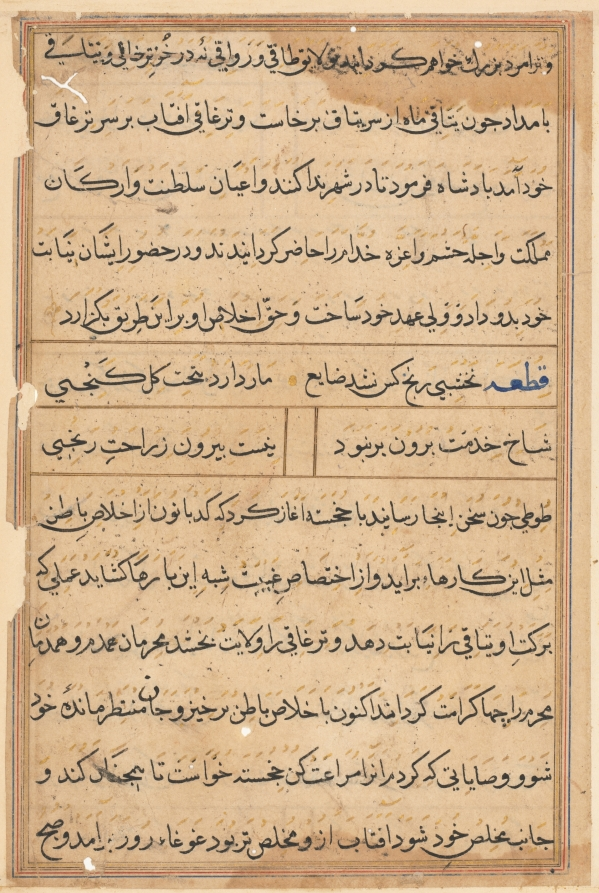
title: Page from Tales of a Parrot (Tuti-nama): text page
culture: Mughal India, court of Akbar (reigned 1556–1605)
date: c. 1560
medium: gum tempera, ink, and gold on paper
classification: Painting